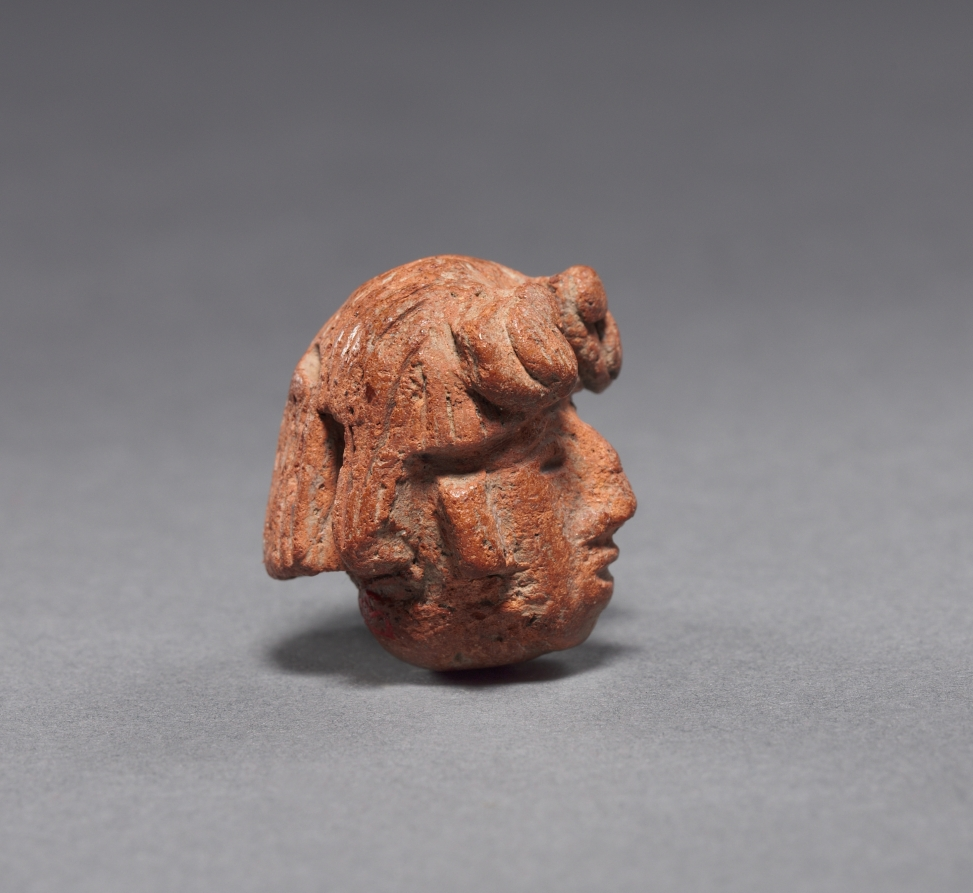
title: Head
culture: Mesoamerica, Pre-Columbian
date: before 1519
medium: clay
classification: Sculpture